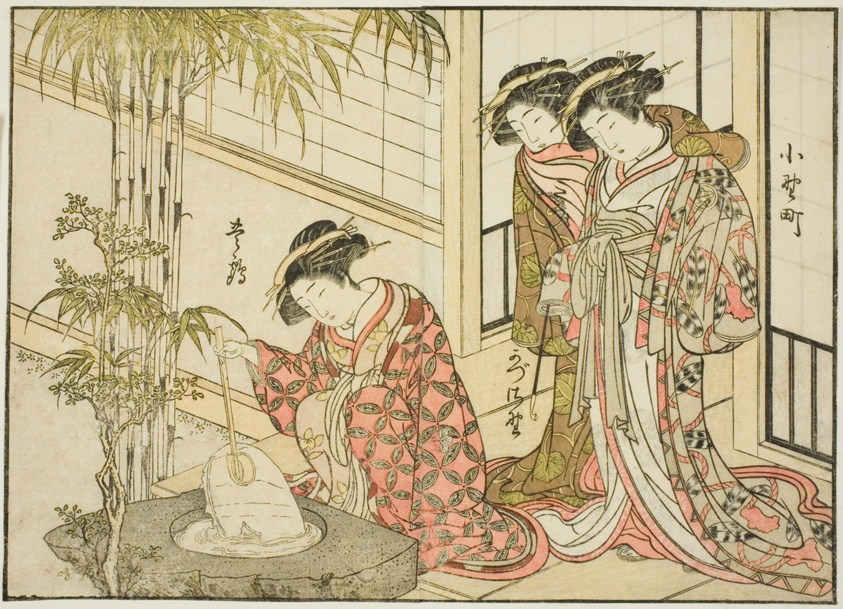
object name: Print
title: Courtesans of the Maruya, from the book "Mirror of Beautiful Women of the Pleasure Quarters (Seiro bijin awase sugata kagami)," vol. 2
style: Japanese (culture or style)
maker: Katsukawa Shunsho; Japanese, 1726-1792; Kitao Shigemasa; Japanese, 1739-1820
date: 1776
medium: Color woodblock print; double-page illustration cut from a book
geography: Japan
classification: woodblock print; print; asian art